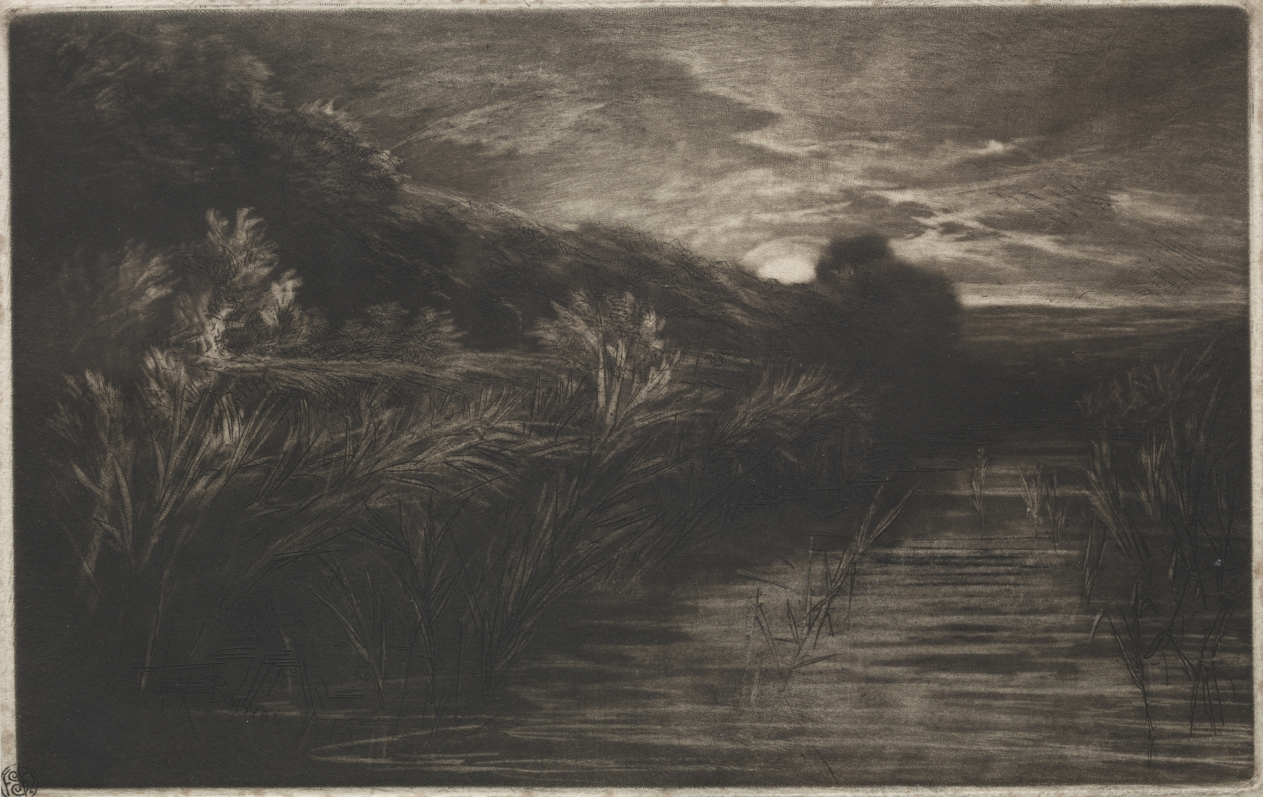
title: Winchelsea Canal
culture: England, 19th century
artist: Francis Seymour Haden (British, 1818–1910)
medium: etching and mezzotint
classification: Print